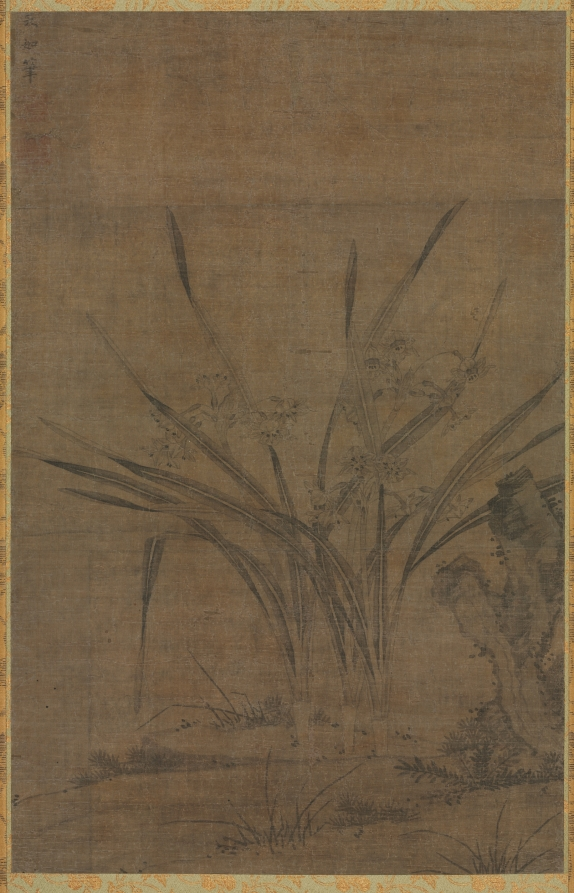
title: Narcissus and Rocks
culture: China, Ming dynasty (1368–1644)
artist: Lu Tianru (Chinese, first half of 1400s)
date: 1368–1644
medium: hanging scroll, ink on silk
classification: Painting